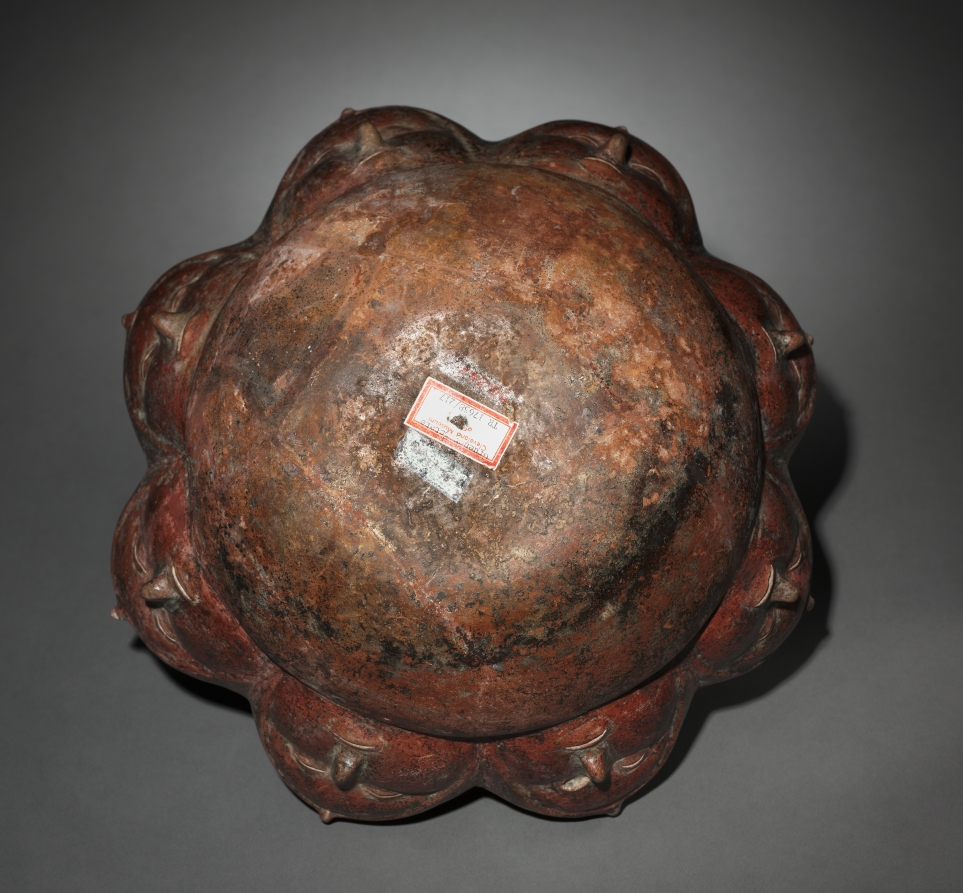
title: Vessel with Crested Heads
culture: West Mexico, Colima, Comala style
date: 200 BCE–300 CE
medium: earthenware with colored slip, black burial deposits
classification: Sculpture